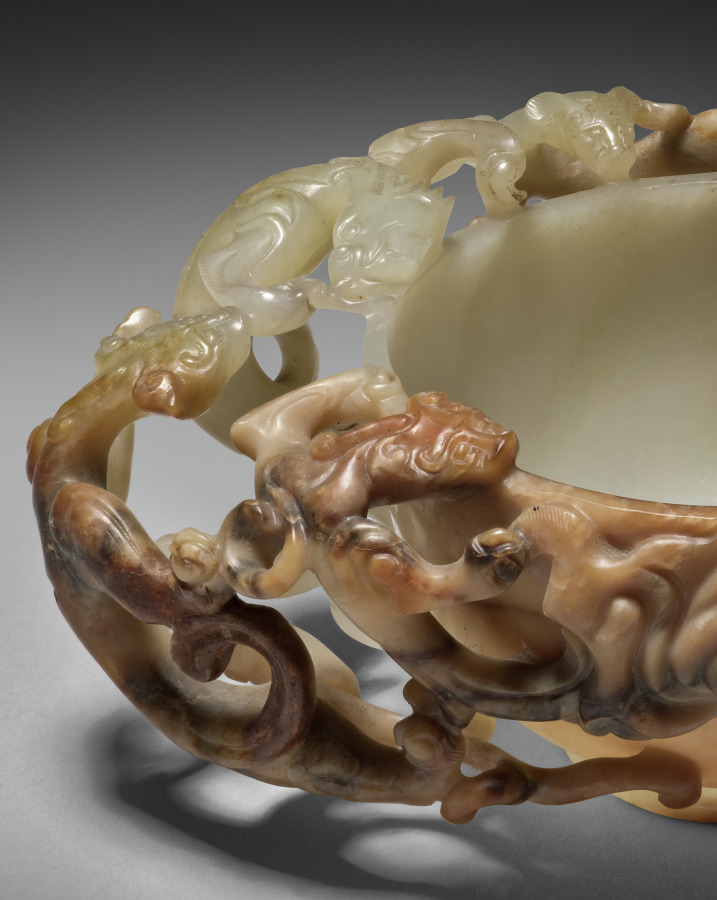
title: Cup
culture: China, Qing dynasty (1644–1911), Qianlong reign (1736–95)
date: 1736–95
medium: jade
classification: Jade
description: In the Qing dynasty, luxury items became more affordable to larger parts of the society, including women, merchants, and literati in nonofficial positions. Imperial patronage and a growing urban population also encouraged consumption of luxury goods and local craftmanship. This cup with open-work interlacing dragons shows the creative mind of the skilled artisan who carved it from a round piece of jade.